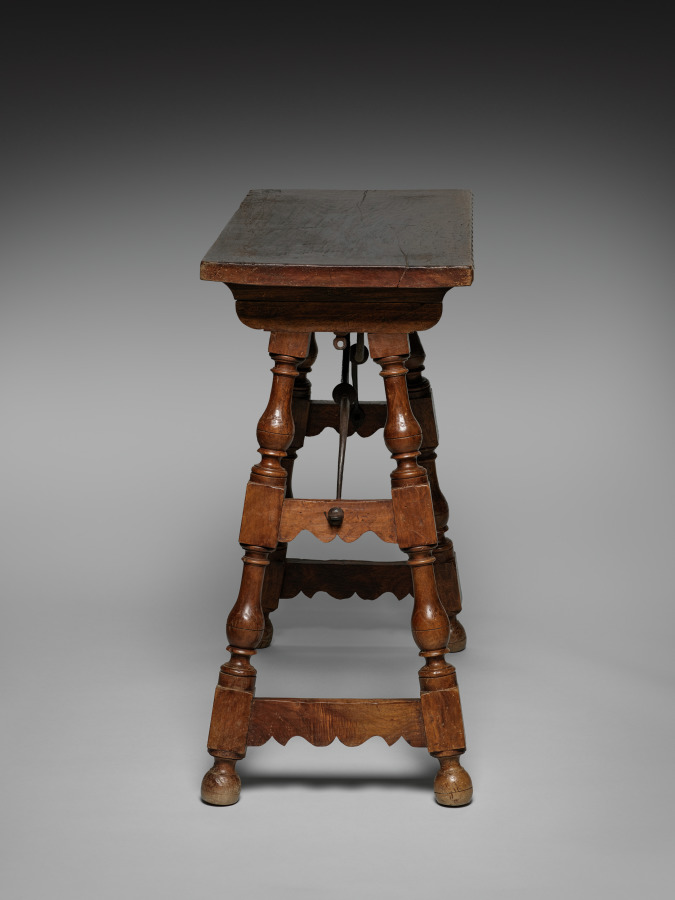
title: Chest (Base)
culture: Spain, Colonial, late 17th Century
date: late 1600s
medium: turned and joined wood with wrought iron hardware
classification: Furniture and woodwork